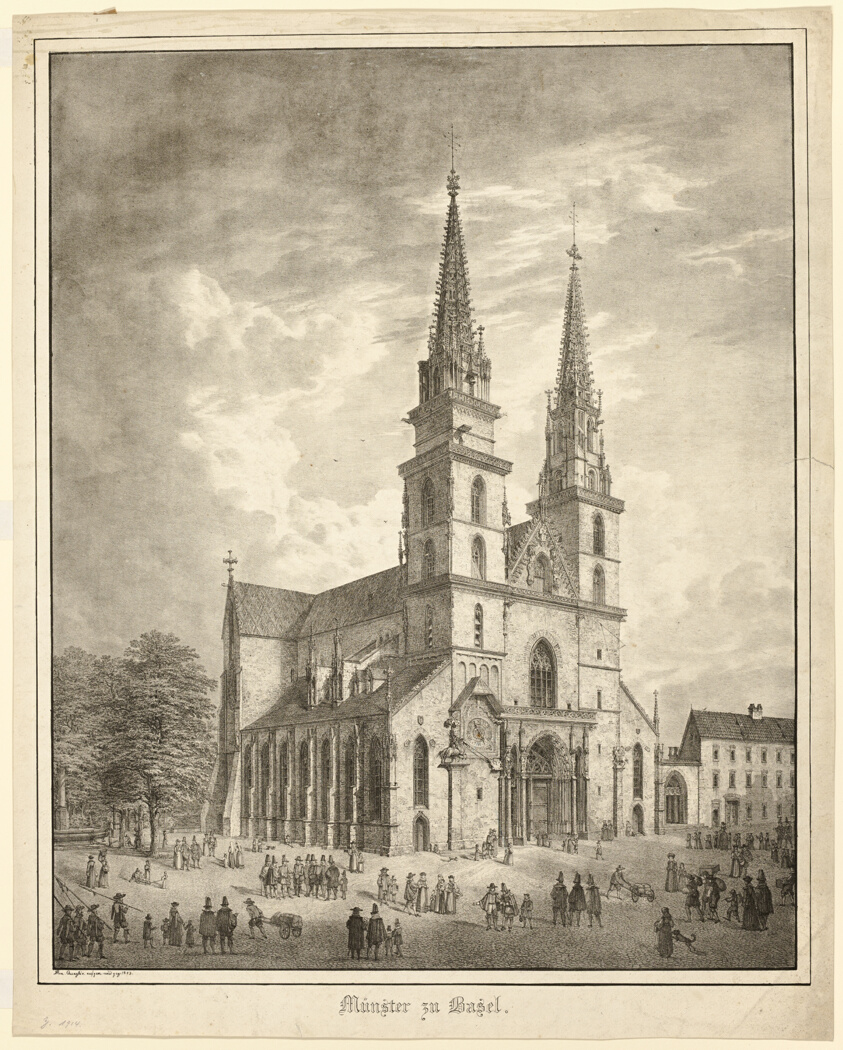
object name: Print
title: Münster zu Basel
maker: Domenico Quaglio II; German, 1787-1837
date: 1823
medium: Lithograph on paper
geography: Germany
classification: lithograph; print; prints and drawing